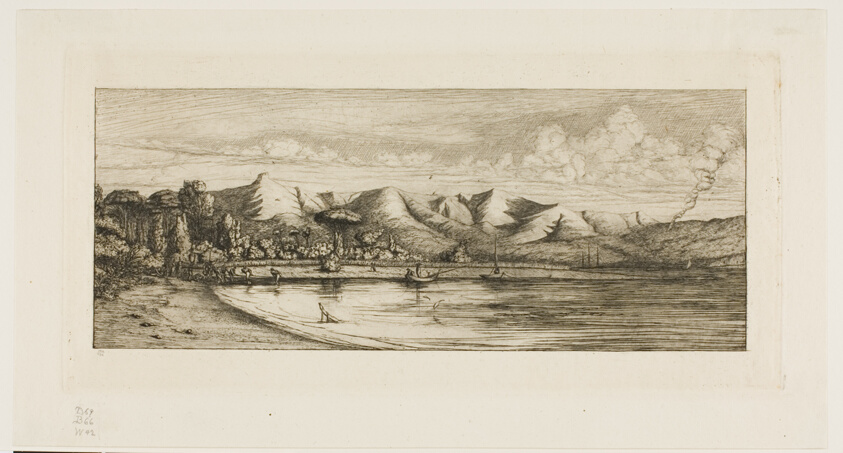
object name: Print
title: Seine Fishing off Collier's Point, Akaroa, Banks' Peninsula, 1845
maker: Charles Meryon (French, 1821-1868)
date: 1863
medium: Etching and drypoint on ivory laid paper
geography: France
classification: etching; print; prints and drawing